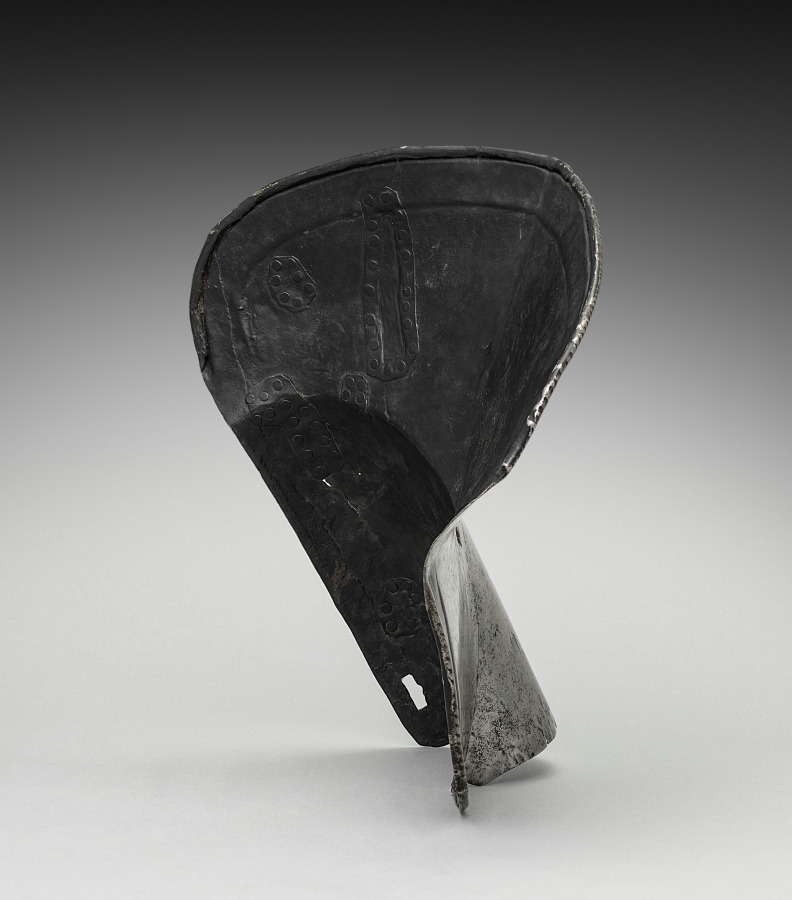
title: Gardbrace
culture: Germany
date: c.1550–1570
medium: iron, steel, leather and brass rivets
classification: Arms and Armor